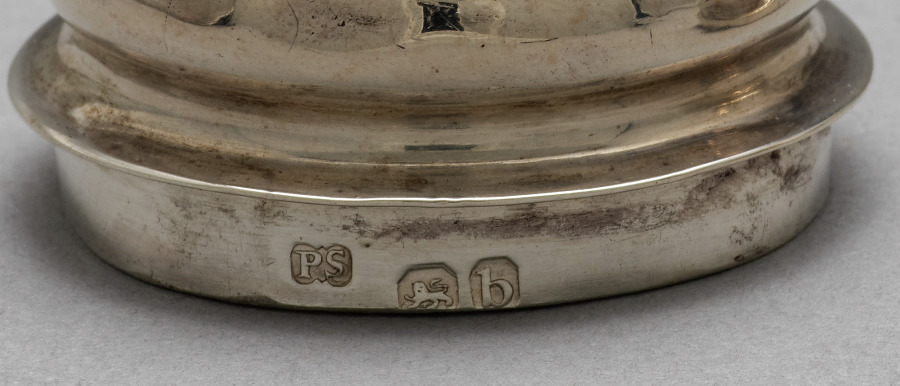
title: Pot (cover) (1 of 2)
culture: England, 19th century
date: 1817–18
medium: silver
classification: Silver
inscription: Stamped on lid: "PS, Lion Passant, "b".